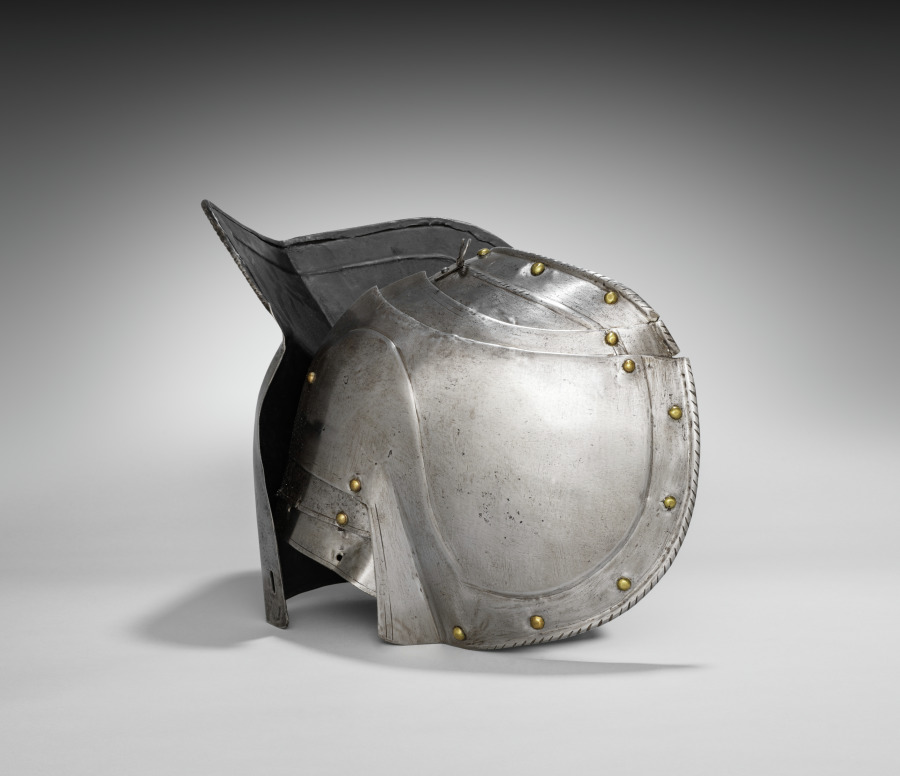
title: Pauldron (proper left) and Grandguard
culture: South Germany, 16th century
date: c. 1560–1580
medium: steel, leather straps, brass rivets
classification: Arms and Armor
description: This armor was developed for the joust--a sporting combat between two mounted contestants. Although all of the elements of this armor date from the same period, they are not all from the same suit. This armor is thus called "composed." It also shows the asymmetry of jousting armor. The participants rode along a wall-like barrier known as a "tilt" with their left sides facing one another. Consequently, armor on that side of the body had to be thicker. Note the large plate (grandguard) over the left shoulder for extra protection. Also, the breathing holes in the helmet were placed on the right side (farthest from an opponent's lance) to avoid injuries from splinters. The bracket attached to the right breastplate is called the lance-rest, a shock-absorbing support designed to accommodate the lance when "couched" under the right armpit.